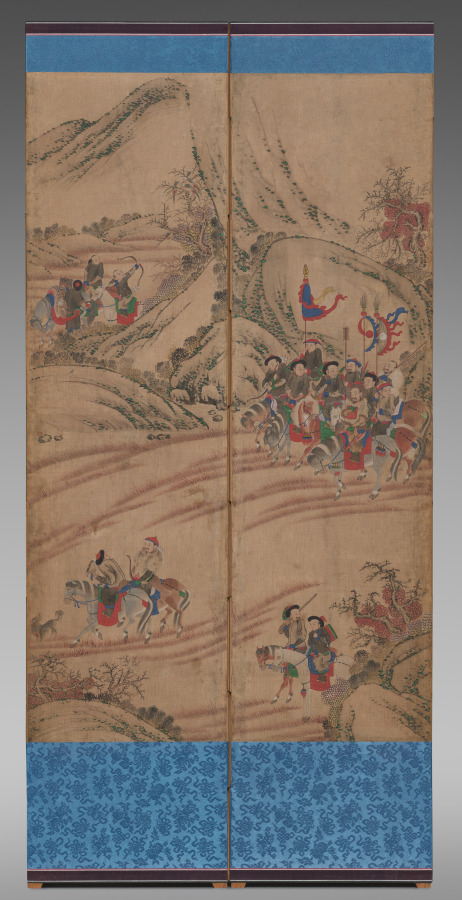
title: Hunting Scene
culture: Korea, Joseon dynasty (1392–1910)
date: 1800s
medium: eight-panel folding screen; ink and color on silk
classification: Painting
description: The theme of nomad warriors riding horses and hunting wild animals was first painted in the Qing imperial court in China in late 1600s. But it became favored by the Korean royal court and painted by the royal court painter in the late 1700s. The Joseon Korean ruling class members considered Qing nomad warriors to be "barbaric," yet highly admired their hunting and military skills. By the late 1800s, folding screens with the hunting scene were used largely for this dynamic and exotic feature.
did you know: The theme of nomad warriors hunting became highly appreciated in the Korean royal court of the 1700s for the king's particular interests in strengthening the royal army's military prowess.